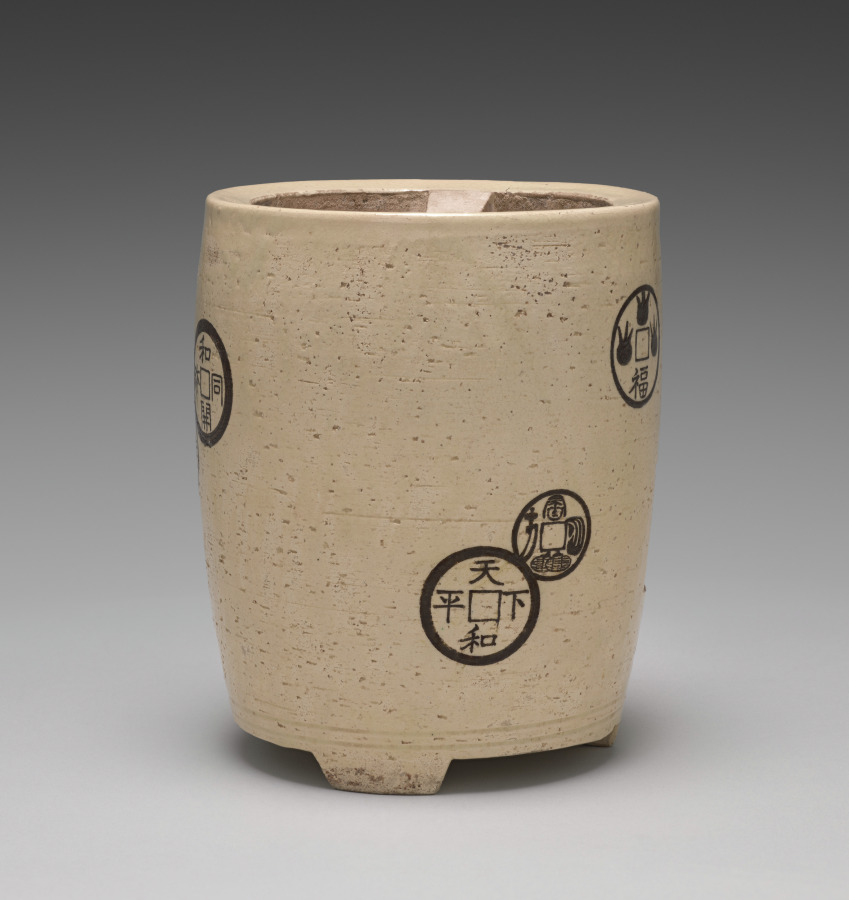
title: Brazier with Coins Motif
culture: Japan, Meiji period (1868–1912)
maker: Seifū Yohei III (Japanese, 1851–1914)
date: 1893–1914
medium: Stoneware with underglaze iron oxide designs and crackling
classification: Ceramic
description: Tall pottery braziers called ryōro are often used to heat the water for the tea served at sencha gatherings. This one sits on three sturdy legs, one of which bears the artist’s seal on its face. A horizontal rectilinear opening above this leg allows air to circulate into the lower part of the brazier. The top part is outfitted with three prongs onto which the kettle can be lowered; below them is a basin, perforated with circular holes, that holds the charcoal fuel. The brazier is decorated under the crackled transparent glaze with a design of old coins in iron oxide. The motif is cleverly chosen, for most older coins are round with a central hole, often square, which echoes the cylindrical form of the brazier with its rectilinear “wind gate,” or fūmon.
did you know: One coin is painted with the Japanese god of wealth, Daikokuten, standing upon two bales of rice.